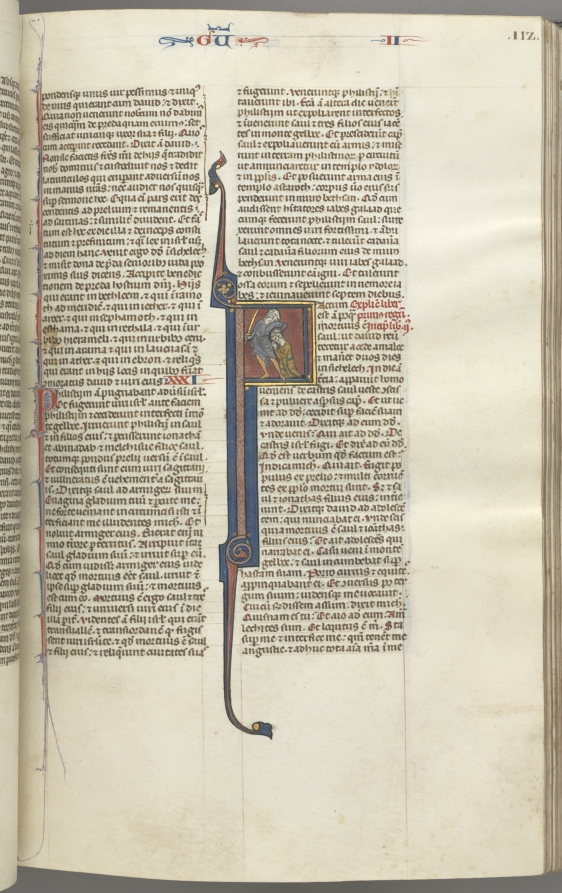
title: Fol. 112r, Kings II, historiated initial F, the beheading of the Amalekite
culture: Southern France, Toulouse(?), 13th century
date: c. 1275–1300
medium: ink, tempera and gold on vellum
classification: Bound Volume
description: Biblical manuscripts were highly prized and important possessions of churches, monasteries, cathedral schools, and universities throughout medieval Europe. The biblical texts were known as the vulgate, the translations made by Saint Jerome in the fourth century from Hebrew and Greek into Latin, which became the definitive and official Latin version of the Roman Church. In the 13th century, the bible was, for the first time, produced as a single volume with an officially sanctioned sequence to its books and chapters as illustrated by this example. The very extensive decoration of this bible is arranged hierarchically to indicate the relative importance of the various texts so that full or almost full-page initials mark the openings of the first prologue, Genesis, and the first Gospel; historiated initials mark the beginning of each book and illuminated initials mark the Prologues.